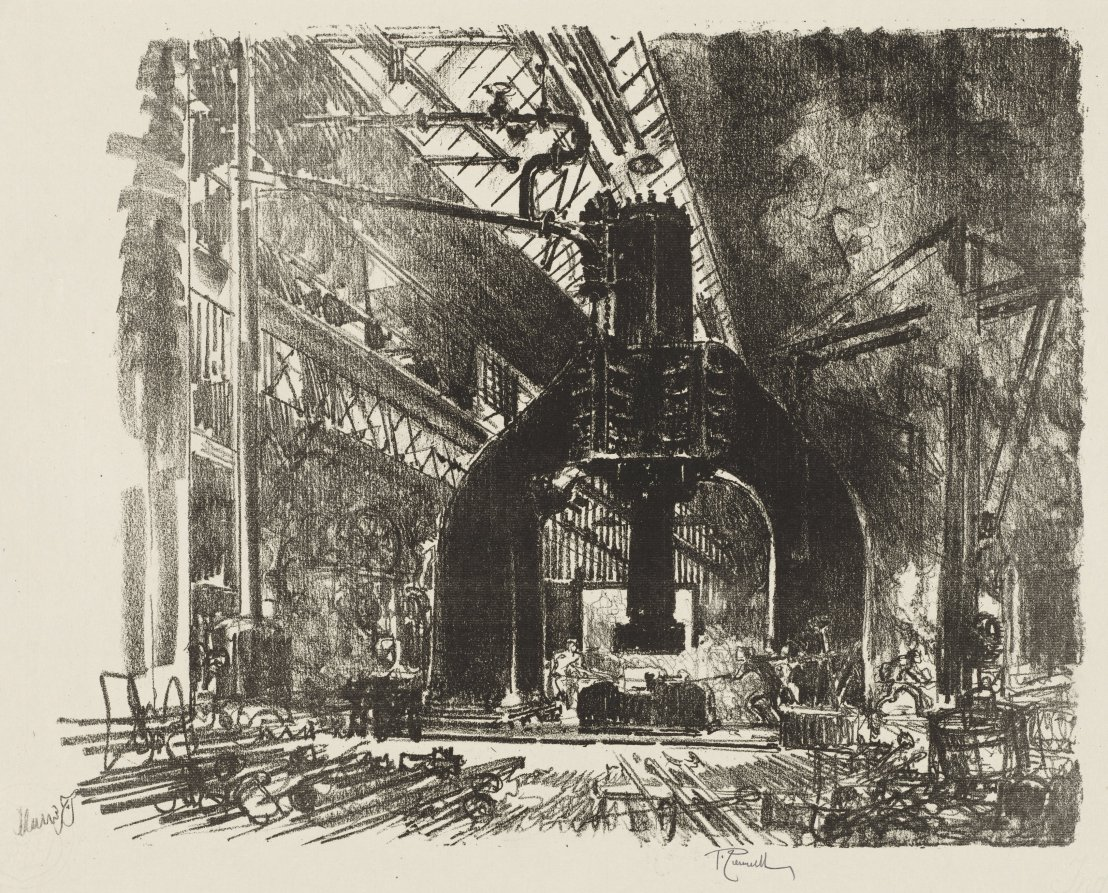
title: English War Work: The Great Hammer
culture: America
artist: Joseph Pennell (American, 1857–1926)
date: 1916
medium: lithograph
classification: Print